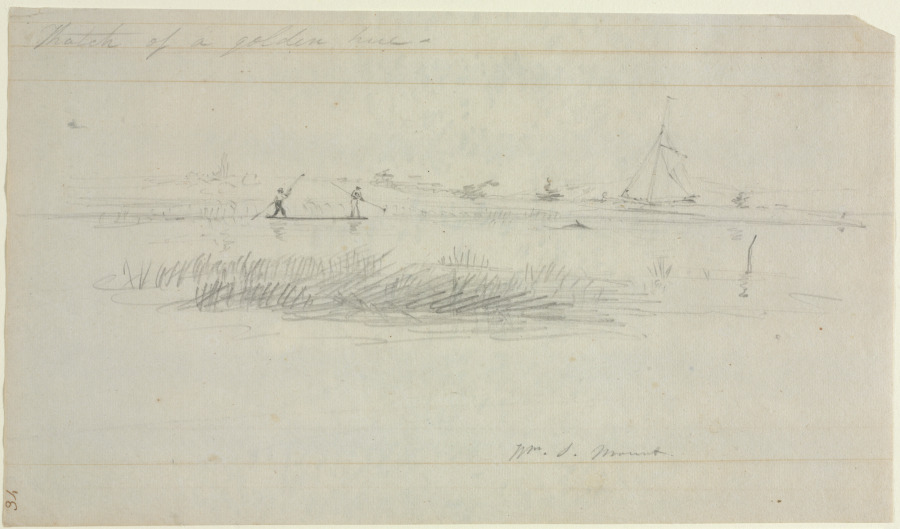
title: Eel Spearing at Setauket, Long Island, New York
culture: America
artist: William Sidney Mount (American, 1807–1868)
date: c. 1845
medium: graphite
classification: Drawing